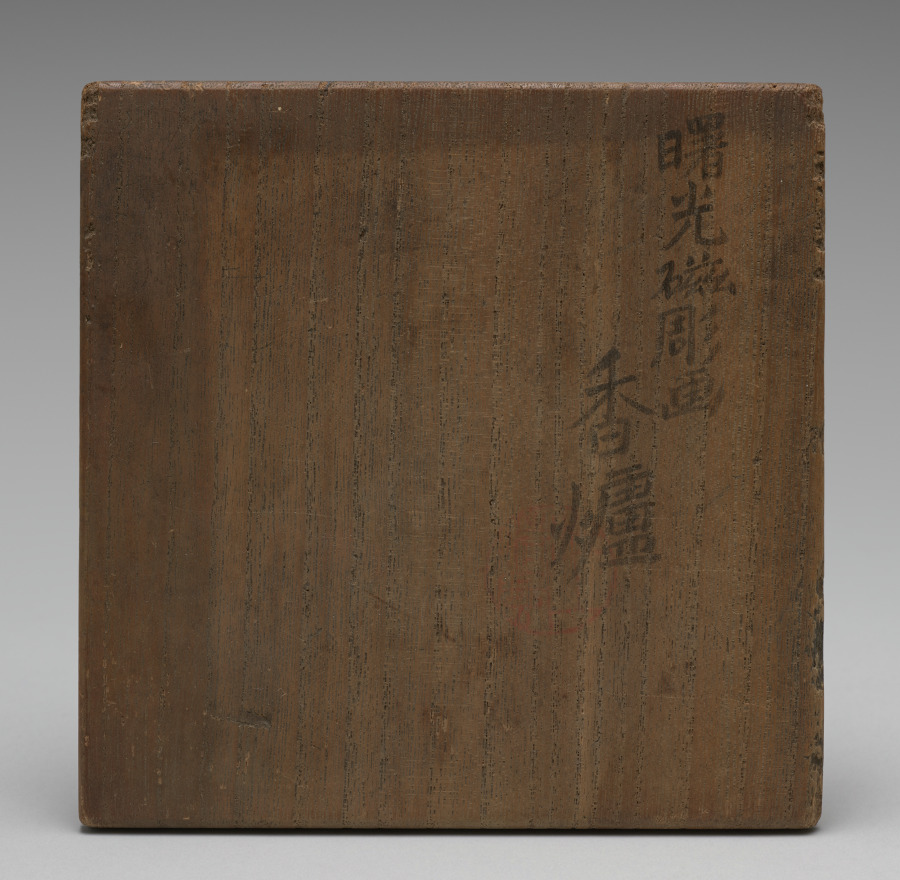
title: Incense Burner with Peony and Cloud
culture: Japan, Meiji period (1868–1912)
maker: Seifū Yohei III (Japanese, 1851–1914)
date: 1914–46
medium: Porcelain with molded and incised design, pale pink glaze, and floral openwork silver lid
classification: Ceramic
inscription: 清風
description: Yohei IV’s incense burner has a scrolling floral pattern of peonies and nyoi staff-head forms around the body and a band of clouds around the collar. These are done in low relief, with incised lines marking the details in the flower petals and leaves. The silver lid has a proliferation of flowers, including lily, peony, and a variety of chrysanthemums. The box lid identifies the subtle pink over an ivory body as “dawn’s light[–glazed] porcelain” (shokōji). After he became an Artist of the Imperial Household, Yohei III created a number of glaze and clay combinations with what would have been considered Japan-focused names to be in alignment with his position as an artist representing the nation. Among them was a glaze called “dawn’s light pale [pink] color” (akebonoiro tansai), which he invented in 1895. It is possible that this incense burner is an example with this glaze, despite the slightly different name given on the box. While the name alludes to the Land of the Rising Sun, an epithet for Japan, the burner’s motifs remain very much drawn from the Chinese repertoire.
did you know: Seifū Yohei IV’s incense burner has a pale pink glaze named “dawn’s light.”